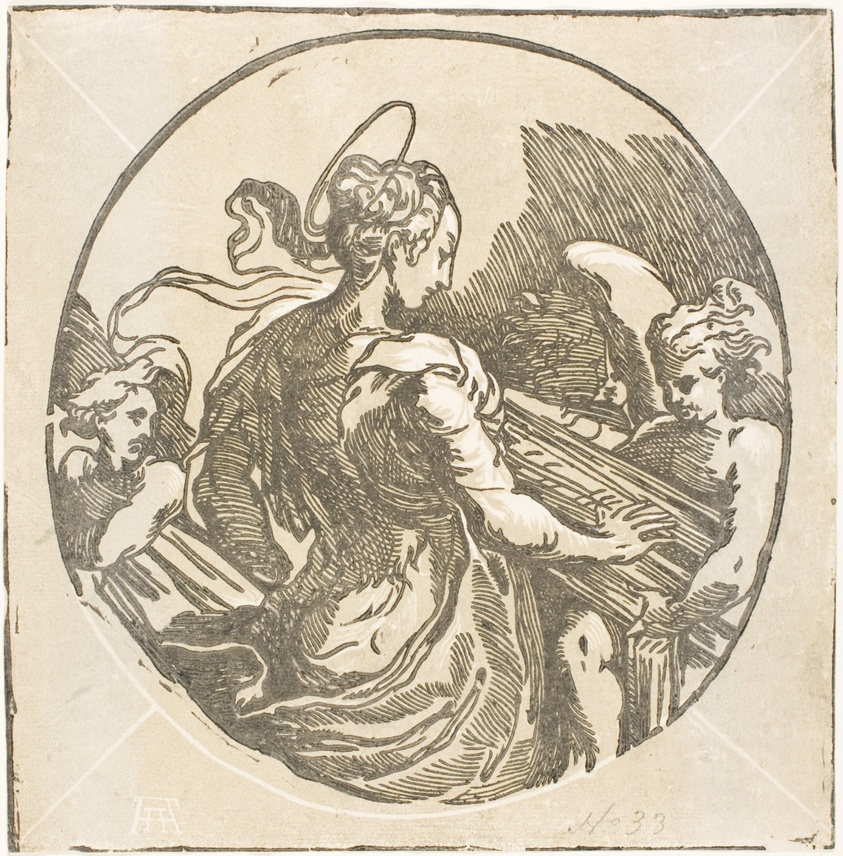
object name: Print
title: Saint Cecilia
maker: Antonio da Trento (Italian, 1510-1550); after Parmigianino (Italian, 1503-1540)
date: c. 1530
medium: Chiaroscuro woodcut in black and tan on paper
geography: Italy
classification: woodcut; print; prints and drawing